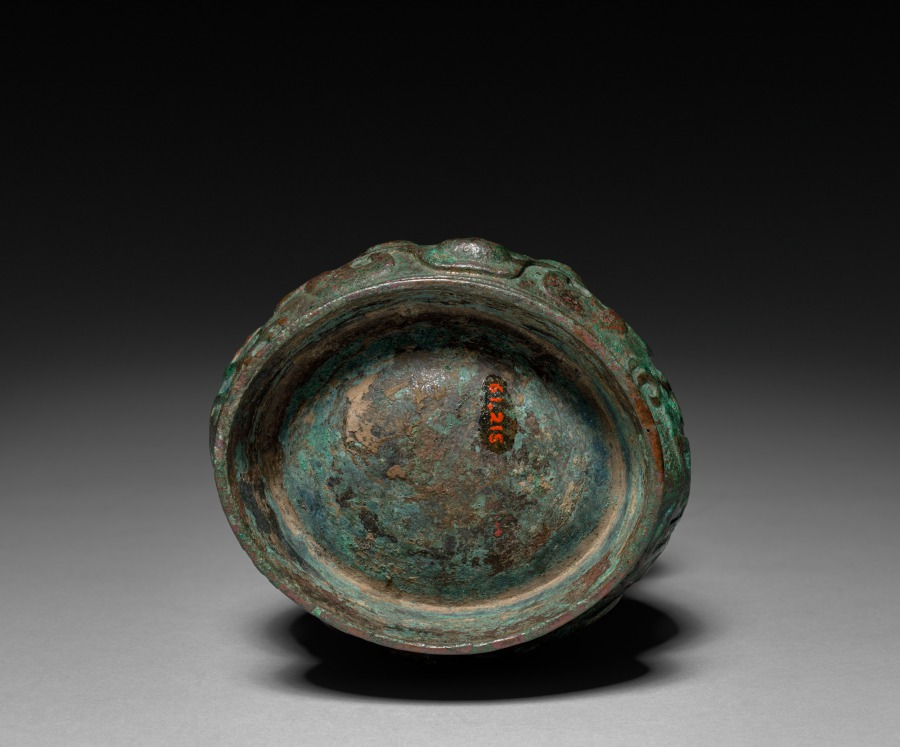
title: Zun: Ceremonial Vessel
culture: China, Zhou dynasty (c. 1046–256 BCE)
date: c. 1023–900 BCE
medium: bronze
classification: Metalwork